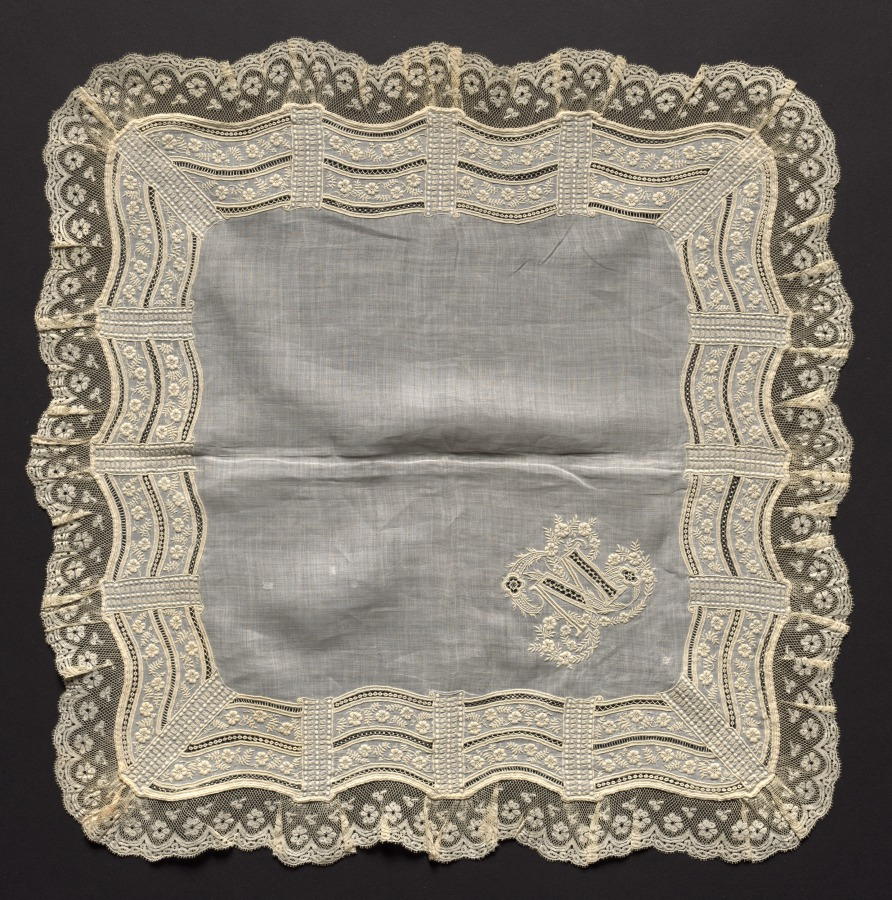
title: Lace Handkerchief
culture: France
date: 1800s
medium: linen ground: embroidery, lace edging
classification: Embroidery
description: The initial M is embroidered in one corner of this handkerchief.